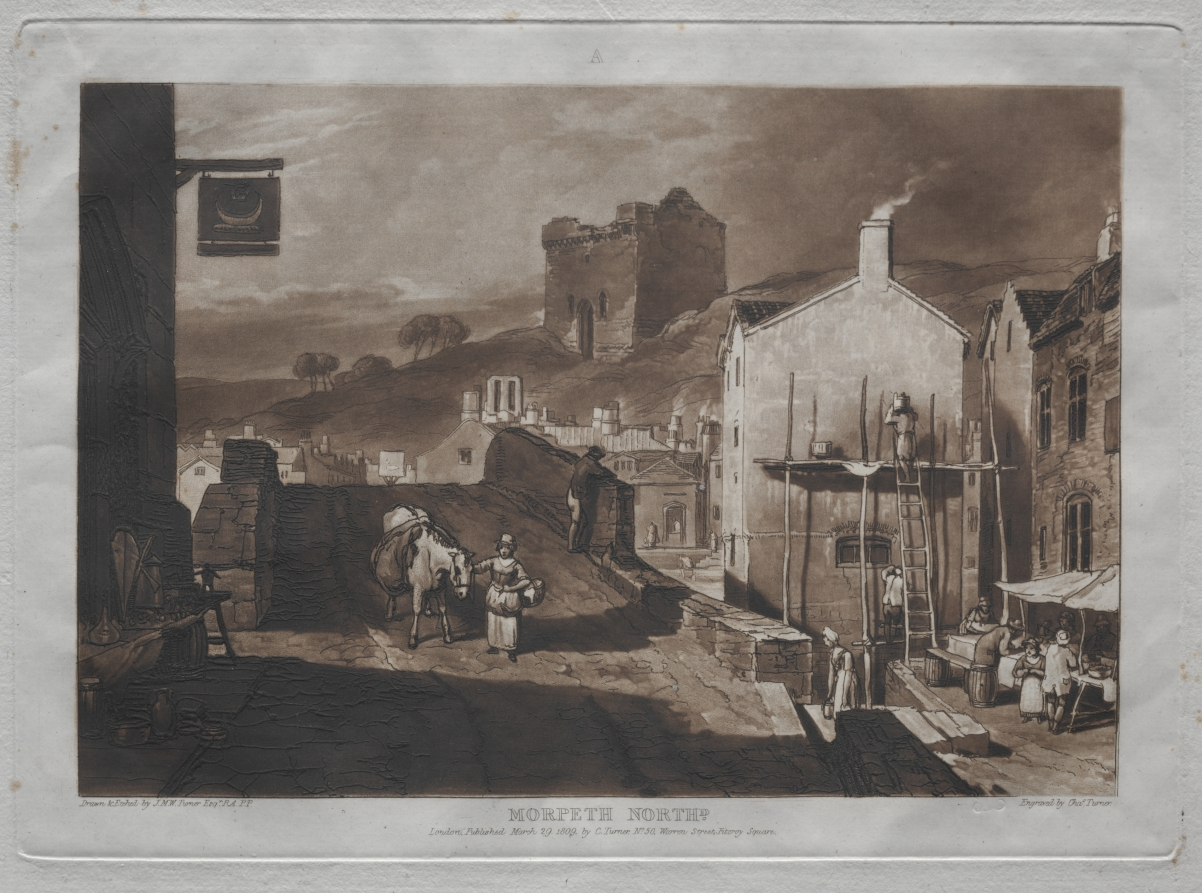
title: Liber Studiorum: Morpeth North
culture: England, 19th century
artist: Joseph Mallord William Turner (British, 1775–1851)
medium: etching and mezzotint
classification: Print